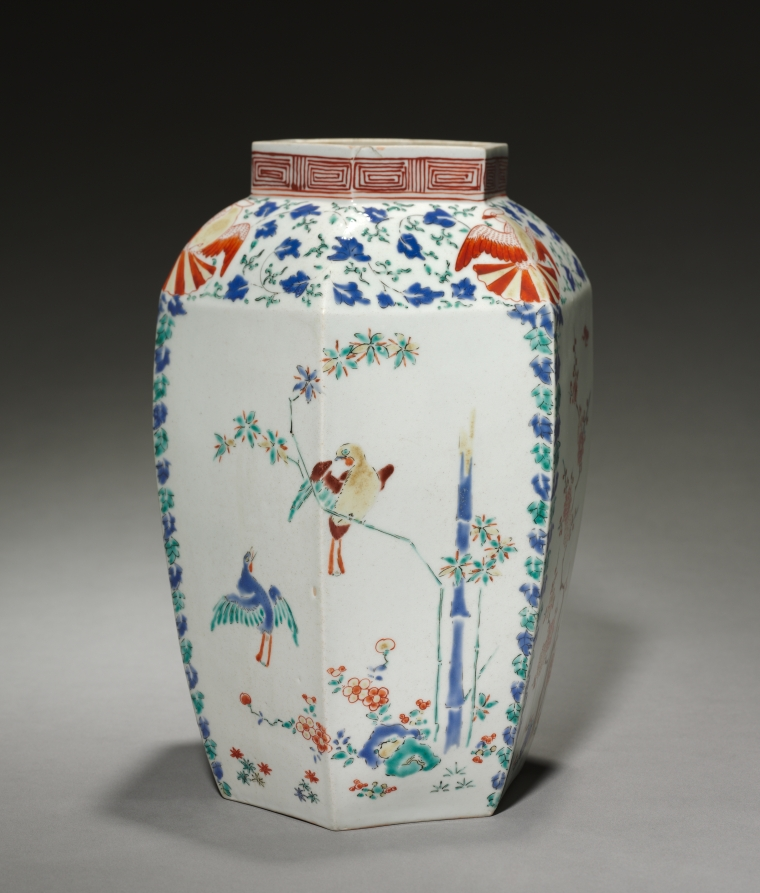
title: Hexagonal Jar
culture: Japan, Edo period (1615–1868)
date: late 1600s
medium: One of a pair; porcelain with overglaze color enamel and gold decoration (Hizen ware, Kakiemon type)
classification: Ceramic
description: This kakiemon-type jar with plum design is a product made for the European markets. Here, Japanese kakiemon potters transformed the typical plum, bamboo, and pine motifs into a theme appreciating the plum. The 9th-century Japanese scholar and politician Sugawara Michizane established the plum as a symbol of scholarship. An excellent poet, particularly of Chinese-style poetry, he was also well known for his love of plum blossoms. Later, the plum came to represent tenmangu, a shrine for Sugawara.